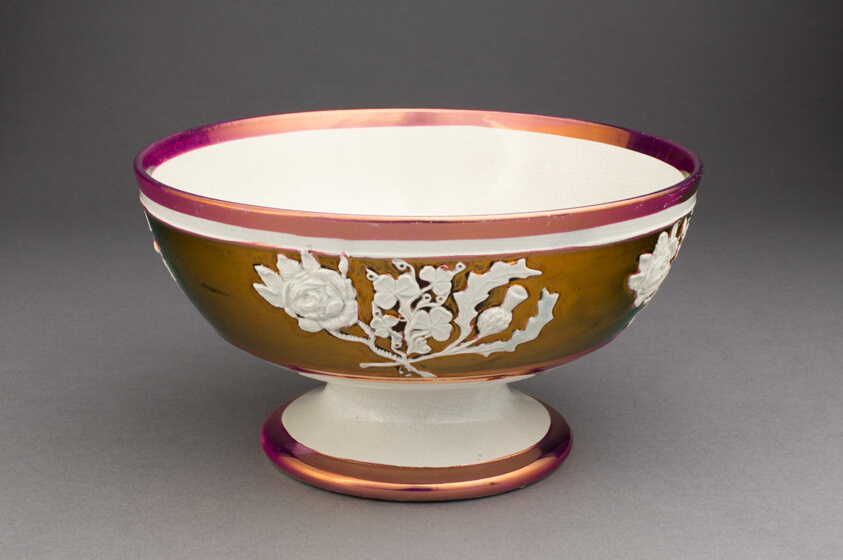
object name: Ceramics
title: Slop Bowl with Symbols of England, Ireland, and Scotland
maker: England, Staffordshire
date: c. 1830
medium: Earthenware with copper lustre decoration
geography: Staffordshire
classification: slop bowl; teaware; ceramics; european decorative arts; earthenware